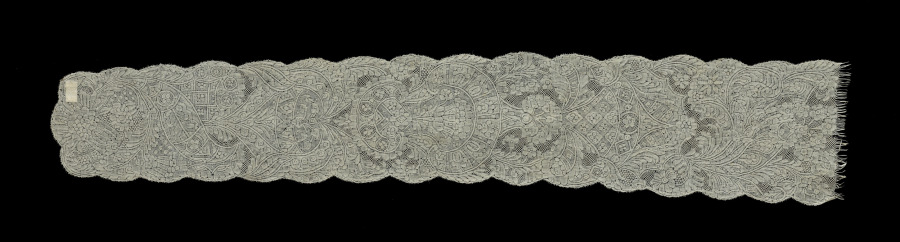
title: Lace Lappet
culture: Belgium, Binche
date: 1740s–50s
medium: Linen: bobbin lace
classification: Lace